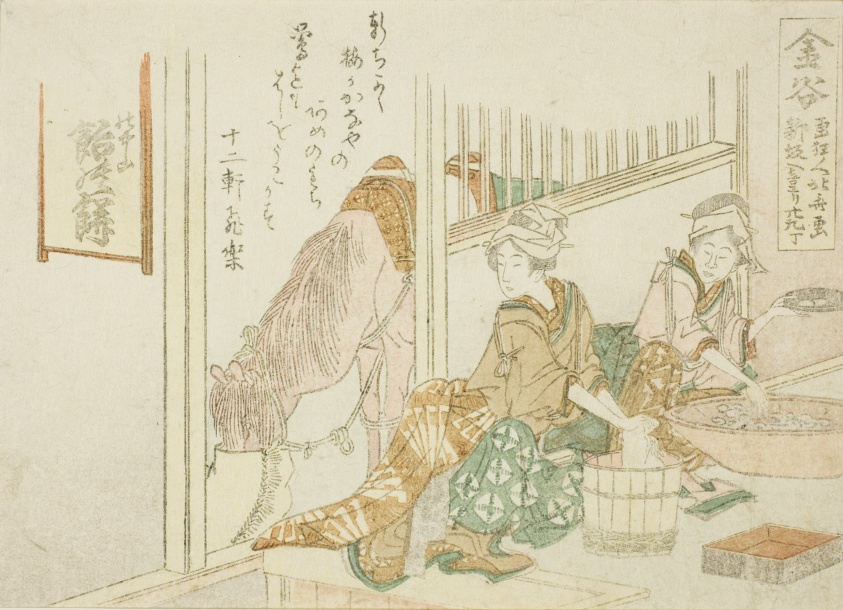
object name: Print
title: Kanaya, from an untitled series of the fifty-three stations of the Tokaido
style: Japanese (culture or style)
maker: Katsushika Hokusai 葛飾 北斎; Japanese, 1760-1849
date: c. 1804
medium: Color woodblock print; kokonotsugiri-ban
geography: Japan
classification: woodblock print; print; asian art